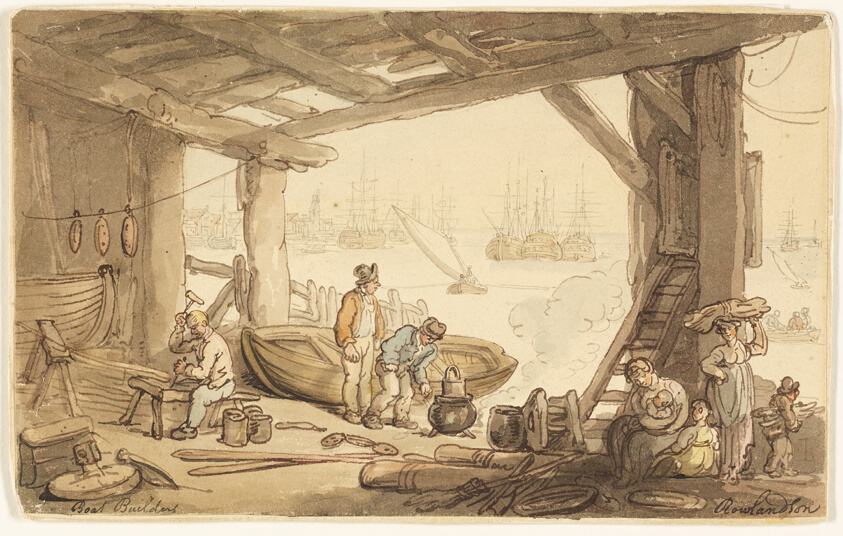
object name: Drawing and Watercolor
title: Boat Builders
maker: Thomas Rowlandson (English, 1756-1827)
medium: Pen and brown ink with brush and watercolor, over traces of graphite, on cream wove paper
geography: England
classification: watercolor; drawings (visual works); prints and drawing